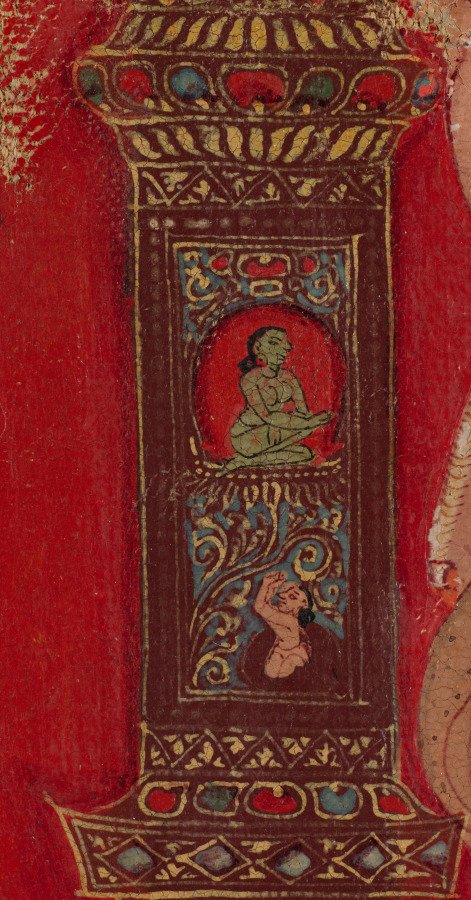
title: Green Tara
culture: Central Tibet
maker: attributed to Aniko (Nepalese, active in Tibet mid- to late 1200s)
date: c. 1260s; mounted, 2020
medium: thangka; gum tempera, ink, and gold on sized cotton; mount: silk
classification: Painting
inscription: Om Ah Hum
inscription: om tare tutare ture svaha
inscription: Om Ah Hum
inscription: Om Ah Hum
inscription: om ah sarva vyida svaha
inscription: ye dharmā hetuprabhavā he- tuṃ teṣāṃ tathāgato hy avadat teṣāṃ ca yo nirodha evaṃvādī mahāśramaṇaḥ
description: For Tibetans, Green Tara is one of the preeminent figures of their Buddhist faith, a radiant savioress who embodies the female form of the perfect, enlightened mind. The Green Tara in the Cleveland thangka—a Tibetan devotional painting on cloth—specifically dispels fear and provides protection, just like her mantra inscribed on the back side of the painting. Her green color and fear-not gesture link her to the cosmic Buddha of the North, enshrined above her head. Most scholars agree that this work was painted by the celebrated Nepalese artist known as Aniko.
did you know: The tiny monastic figure under Green Tara's right hand commissioned the painting.